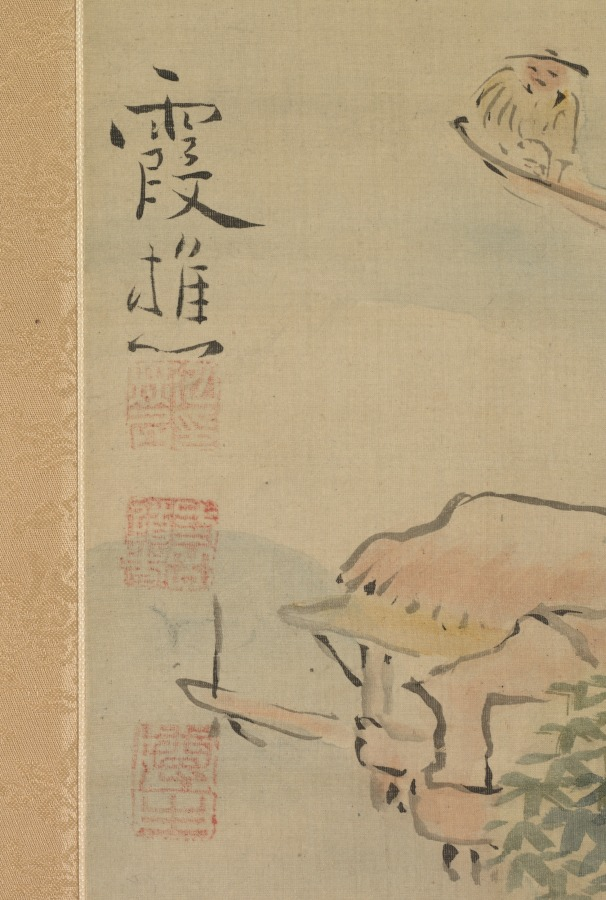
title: Fishing in Springtime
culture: Japan, Edo period (1615–1868)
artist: Ike Taiga (Japanese, 1723–1776)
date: 1700s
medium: Hanging scroll; ink and color on silk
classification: Painting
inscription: Signature: 霞樵, transliteration, Kashō; seals: 池無名印, transliteration, Ike Mumei in; 三岳道者, transliteration, Sangaku Dōja; 遵生, transliteration, Junsei.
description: Ike Taiga was subject to many artistic influences; we know he practiced Zen calligraphy from an early age, his father may have had ties to the famous painter Ōgata Kōrin (1658–1716), he may have trained under a Tosa school painter, and he is thought to have seen Western images early on that informed his approach in representing depth. Though he started with professional beginnings—making a living after his father’s death by selling paintings on fans—he surrounded himself with the members of the literati community, and never stopped absorbing stylistic influences from diverse sources throughout his career. As a result, his style is unique and aesthetically definitive of nanga—the name given to Japanese literati painting.